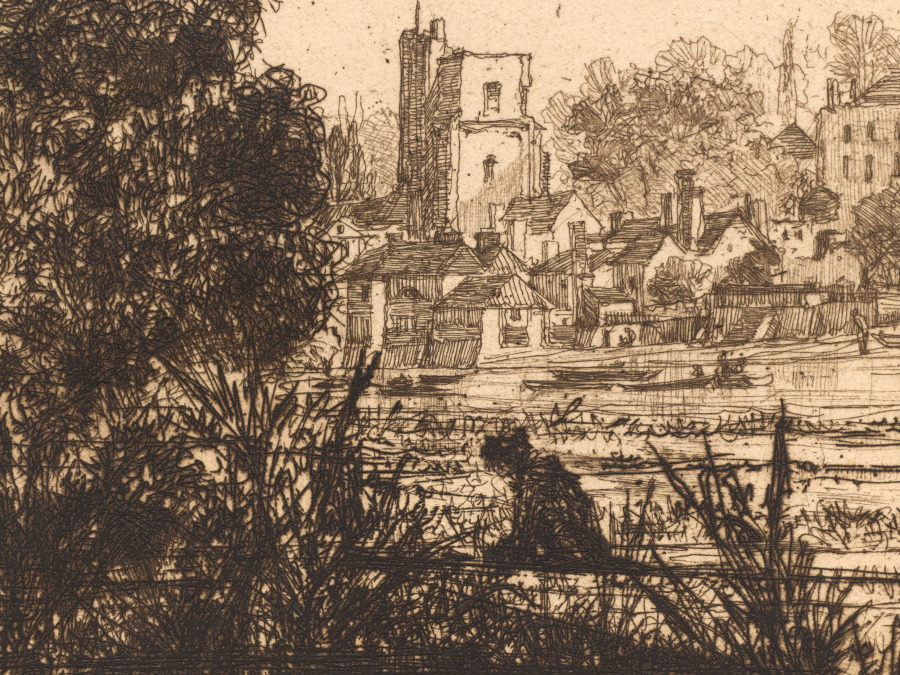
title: Hamerton's Portfolio III: Twickenham Church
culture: England, 19th century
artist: Francis Seymour Haden (British, 1818–1910)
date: 1865–72 (published 1872)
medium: etching and drypoint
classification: Print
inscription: Lower right, in graphite: Seymour Haden; lower left in graphite: D 75? Etched in plate, lower left: By Twickenham S Haden, 1865 Lower right, in graphite: Seymour Haden; lower left, in graphite: D. 75?